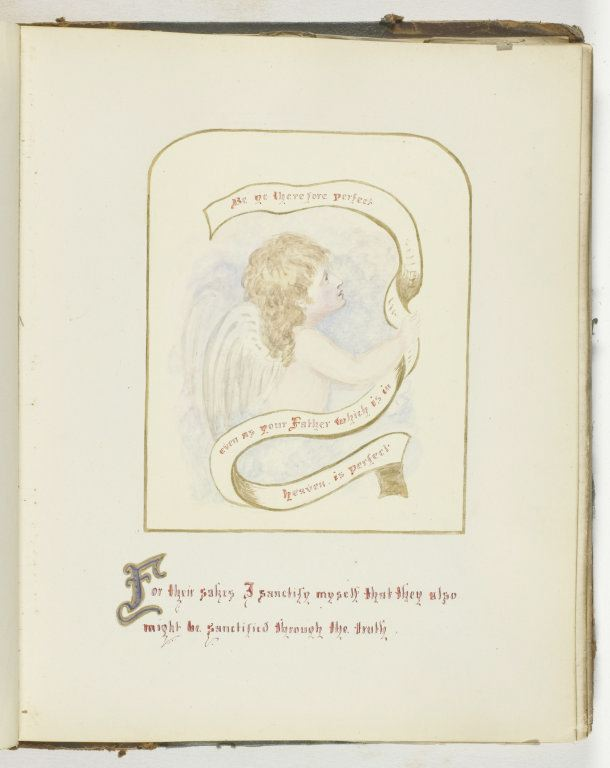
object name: Photograph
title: Untitled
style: 19th century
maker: Georgina Cowper, attributed; English, mid 19th century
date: 1855/68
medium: Ink and watercolor on paper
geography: England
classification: photograph; photography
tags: Collected by Hugh Edwards, Untitled Album 1849-60, Auld Lang Syne